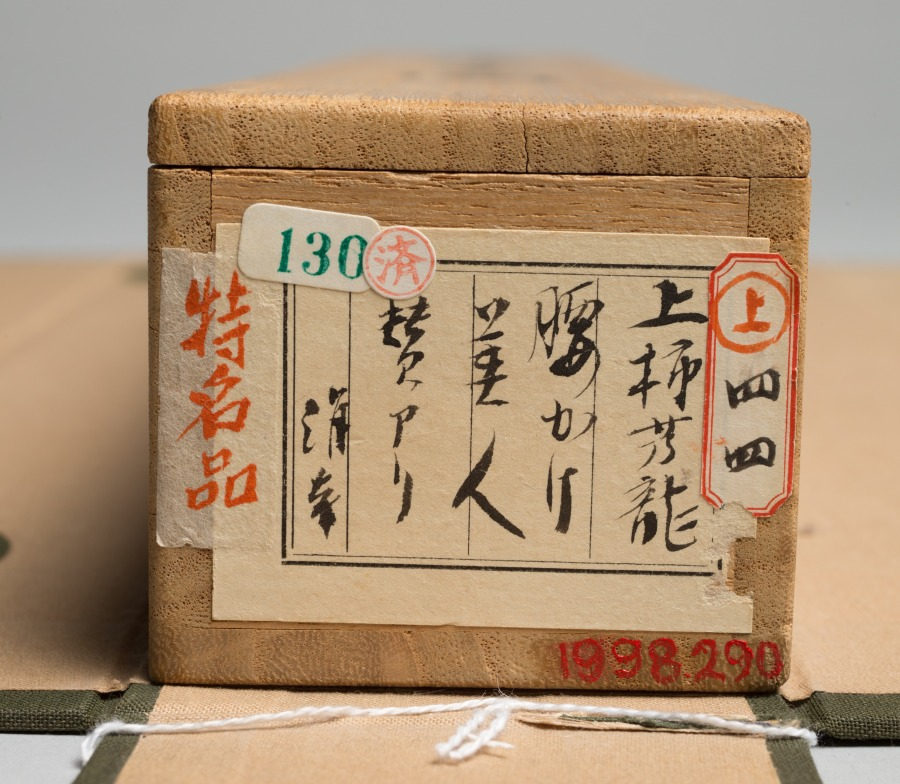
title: Courtesan Seated on a Bench Enjoying the Evening Cool in Summer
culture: Japan, Edo period (1615–1868)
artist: Kamigaki Hōryū (Japanese, dates unknown)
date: 1615–1868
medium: hanging scroll, ink and color on silk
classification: Painting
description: In a pensive pose with her chin resting in her hand, a courtesan is seated on a wooden bench that extends diagonally across the lower half of the scroll. Her open robe suggests that it is a warm evening-perhaps late summer or early fall, as indicated by the grapevine pattern on her kimono. The floral patterns in the composition hint at the seasons: the plum blossom on the fan for spring; grape pattern on the robe for late summer; and chrysanthemum design on the bench indicating autumn. Note also how the grapevine pattern in the painting's mounting mimics the design of her kimono. The overall mood is one of intimacy, created by Hõryþ through the delicate rendering of the courtesan's facial features and hands. In contrast to the other scrolls of beauties nearby, the artist here portrayed his subject with little background, allowing her grace and elegance to carry the picture.